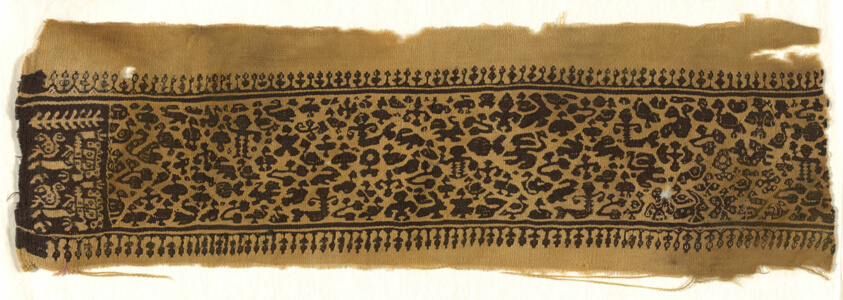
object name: Textile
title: Panel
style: roman period (egyptian), coptic (period)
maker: Coptic (Egypt)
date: Roman period (30 B.C.–641 A.D.), 3th/6th century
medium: Linen amd wool, tapestry weave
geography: Egypt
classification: textile; weaving